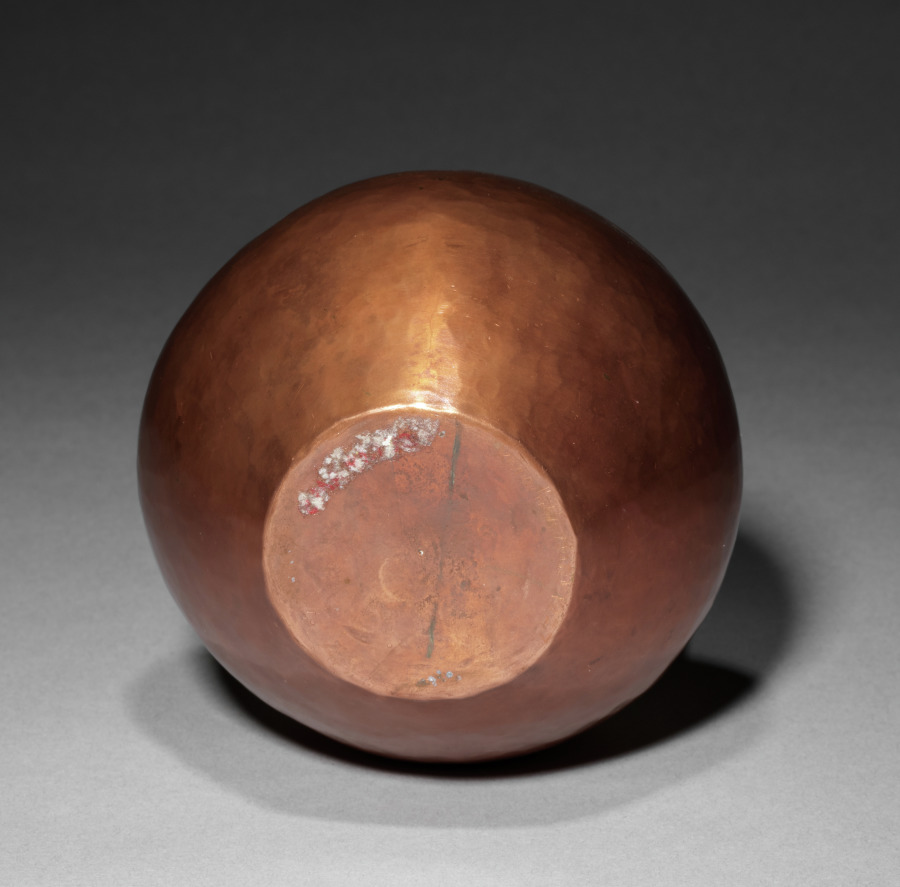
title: Bowl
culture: America, Ohio, Cleveland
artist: Kenneth F. Bates (American, Cleveland, 1904–1994)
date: 1927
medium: copper and enamel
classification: Enamel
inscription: incised on bottom: "Kenneth F. Bates 1927."